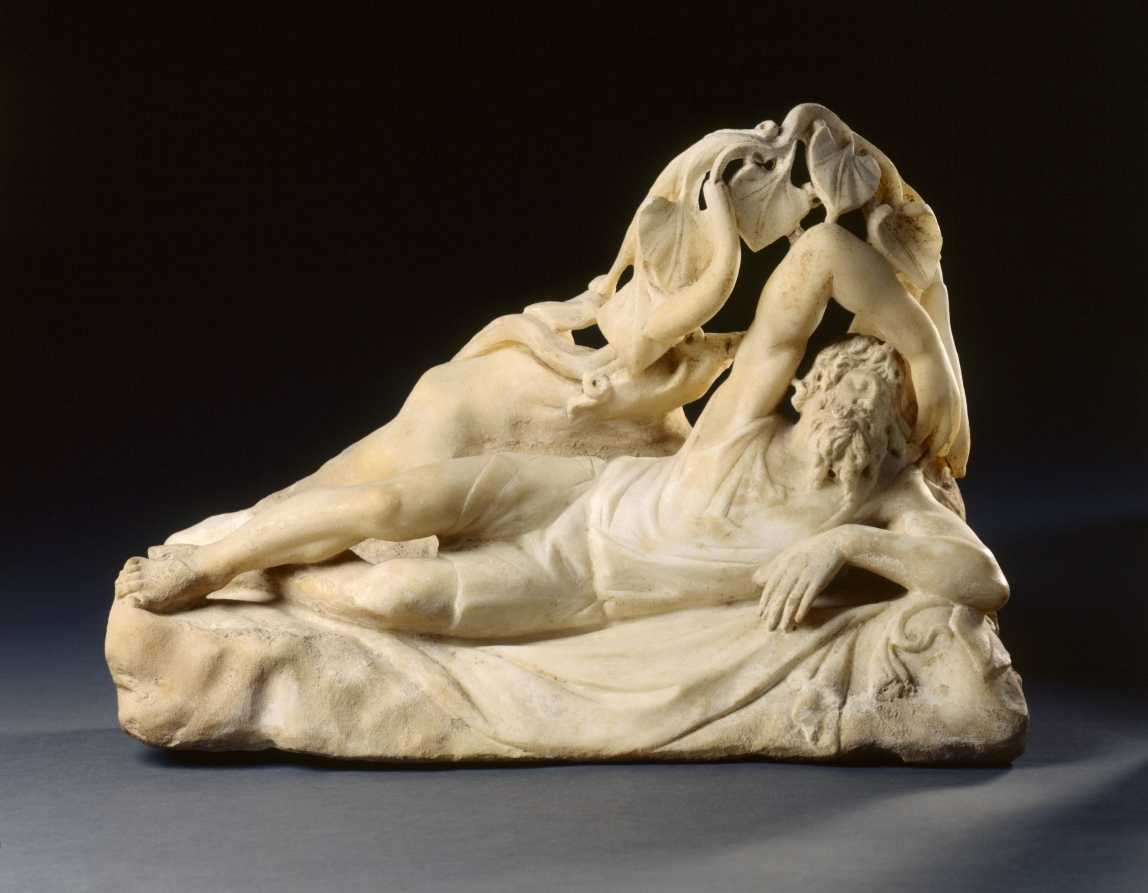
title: Jonah Under the Gourd Vine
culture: Anatolia, late Roman-early Christian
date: 280–90 CE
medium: marble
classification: Sculpture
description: After disobeying the Lord’s command to proclaim judgment on the city of Nineveh, the Old Testament prophet Jonah was cast into the sea, swallowed by a sea monster, and ultimately cast ashore. When asked a second time, Jonah obeyed the Lord but became displeased when the city was spared. After pleading for Nineveh’s destruction, Jonah left the city and rested in the shadow of a large gourd vine. The Lord, however, made the vine wither, exposing Jonah to the burning sun.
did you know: The sculpture shows the dramatic moment when the Jonah, having languished in the desert, is saved by the shade of a gourd vine. The sculptor paid great attention to detail such as Jonah's bushy beard echoing the large leaves overhead.